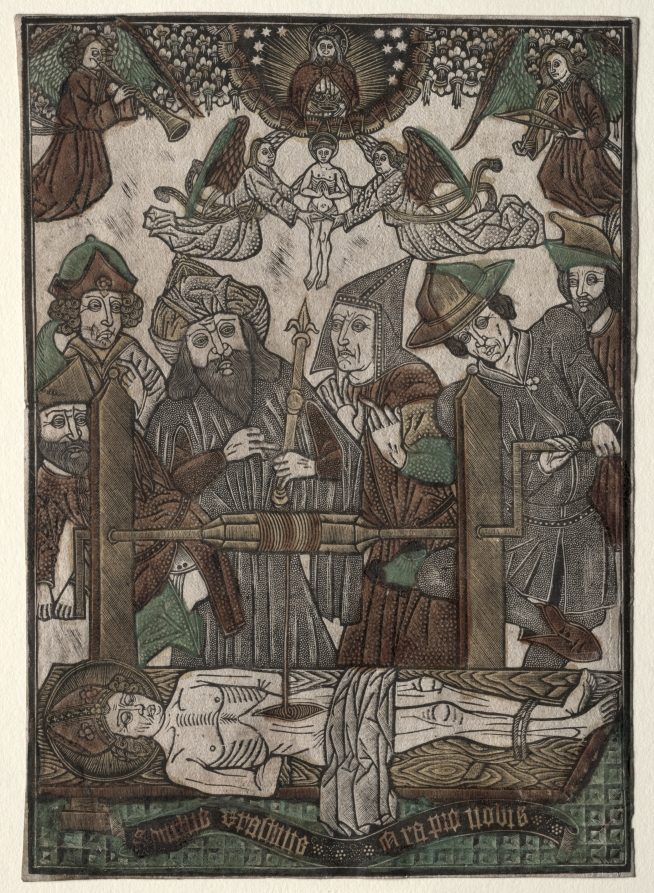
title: The Martyrdom of St. Erasmus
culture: Germany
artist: Master of the Bergwolken (German)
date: c. 1480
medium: dotted print with hand coloring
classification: Print